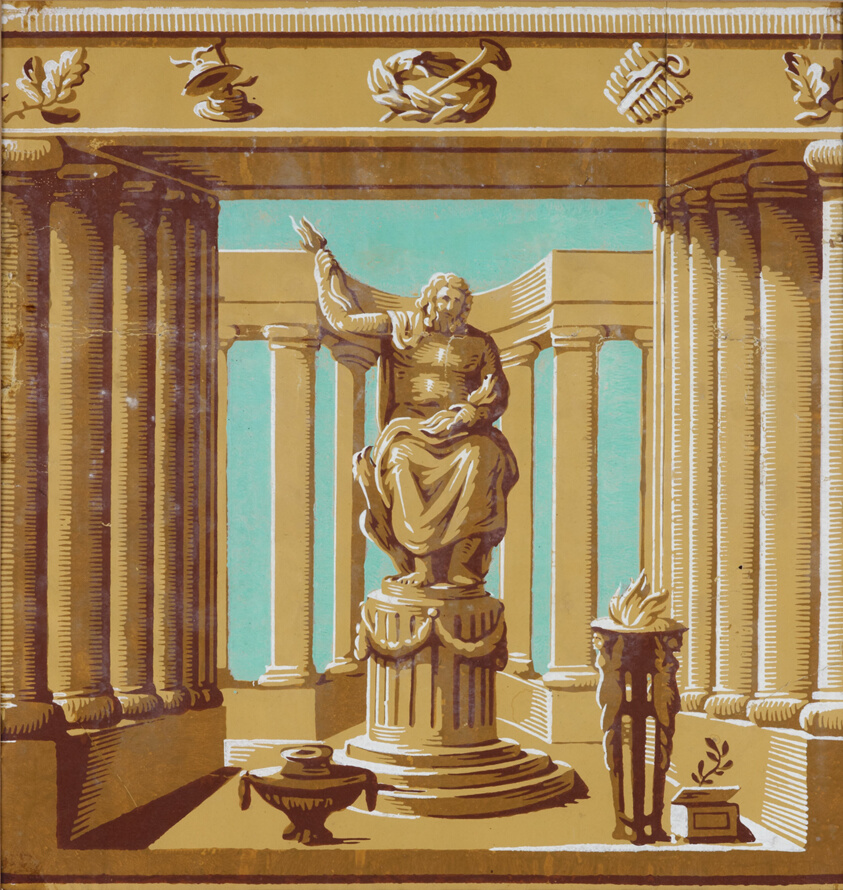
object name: Coverings and Hangings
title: Frieze or Dado: La Constance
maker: France; Jean Baptiste Réveillon (French, 1725-1811)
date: 1785/90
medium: Block-printed, color on paper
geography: France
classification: wallpaper; paper; european decorative arts